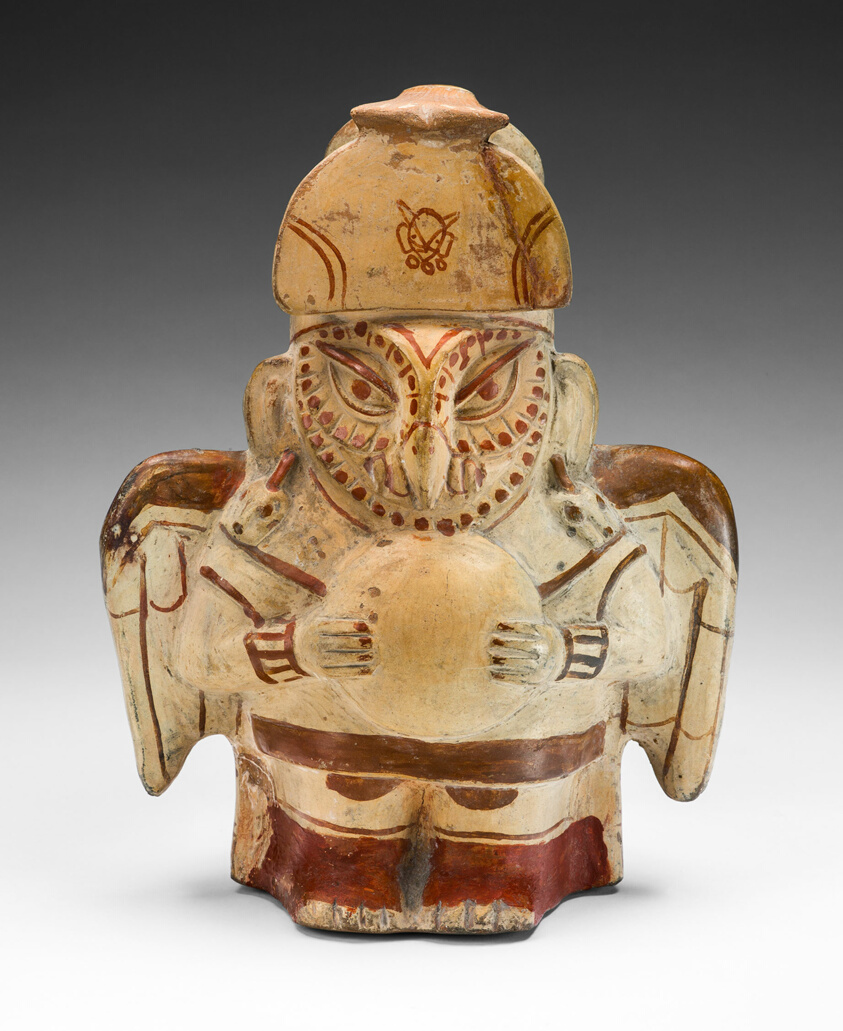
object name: Vessel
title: Vessel in the Form of an Owl Impersonator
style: moche, mochica, early intermediate period, Pre-Columbian, americas, andes, Arts of the Americas, andean, south american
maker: Moche (North coast, Peru)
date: 100 BCE–500 CE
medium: Ceramic and pigment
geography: Peruvian North Coast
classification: earthenware; art of the americas; ceramics; vessel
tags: ritual, animals, birds, masks, costumes, anthropomorphic figure